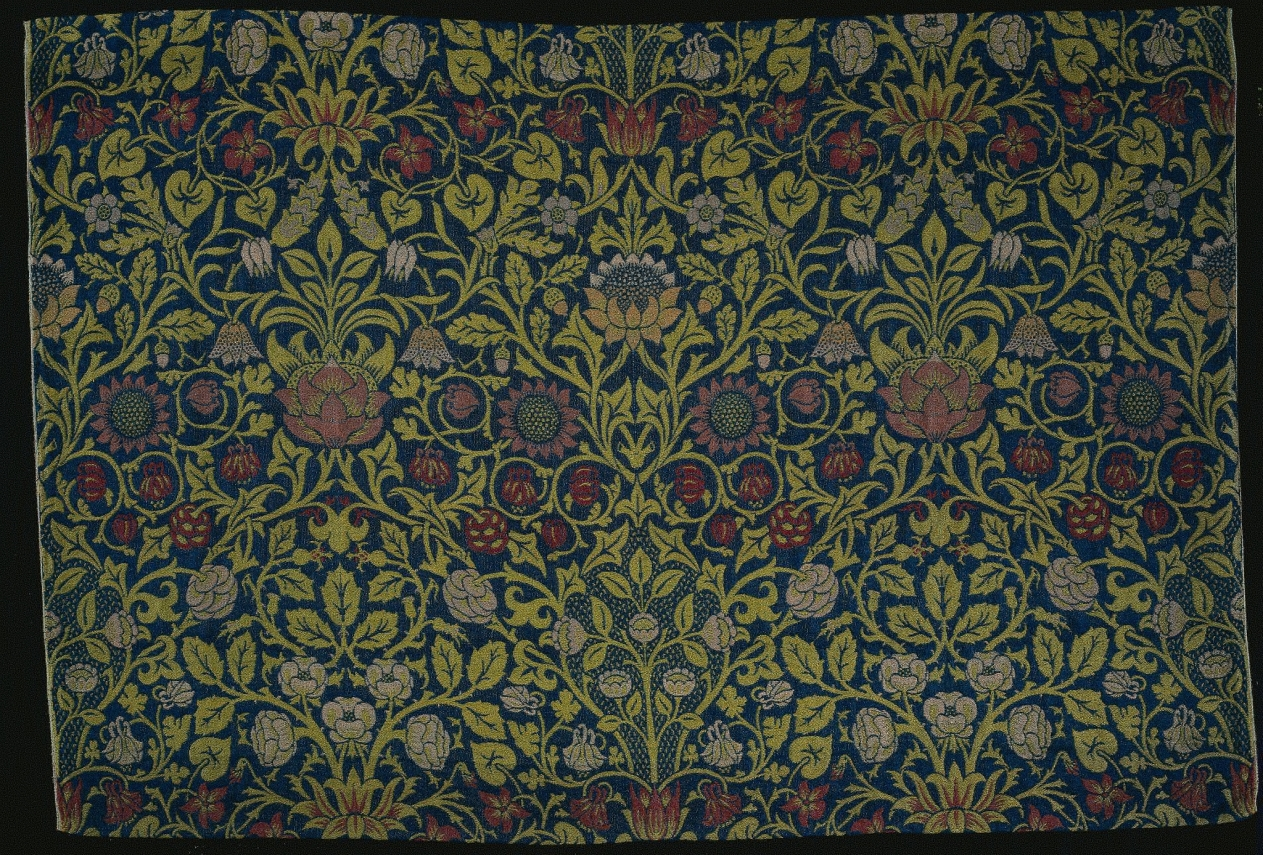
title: Violet and Columbine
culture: England, Surrey, Merton Abbey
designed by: William Morris (British, 1834–1896)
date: 1883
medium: jacquard loom woven weft-faced twill, double cloth; wool and mohair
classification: Textile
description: Morris envisioned textiles such as Violet and Columbine hanging in heavy folds, the rich colors and flowing pattern suggesting a garden wall. He strongly preferred experimenting with natural dyes instead of using the garish chemical ones that had become standard in industrialized England. Even though organic dyes were expensive and scarce, and required dyers to revive old methods, they were less likely to fade in the light or during washing, and they were capable of producing more subtle tonal effects. A sense of the process of hand-weaving can be understood by looking at the back of this textile. The warp (up and down) threads are light blue and green—visible at the bottom. The textile was woven in long lengths that could be cut at these passages of loose thread. The weft (side to side) threads in several colors, including red, pink, yellow, and blue, are more visible from the back than the front, where they disappear into the pattern.